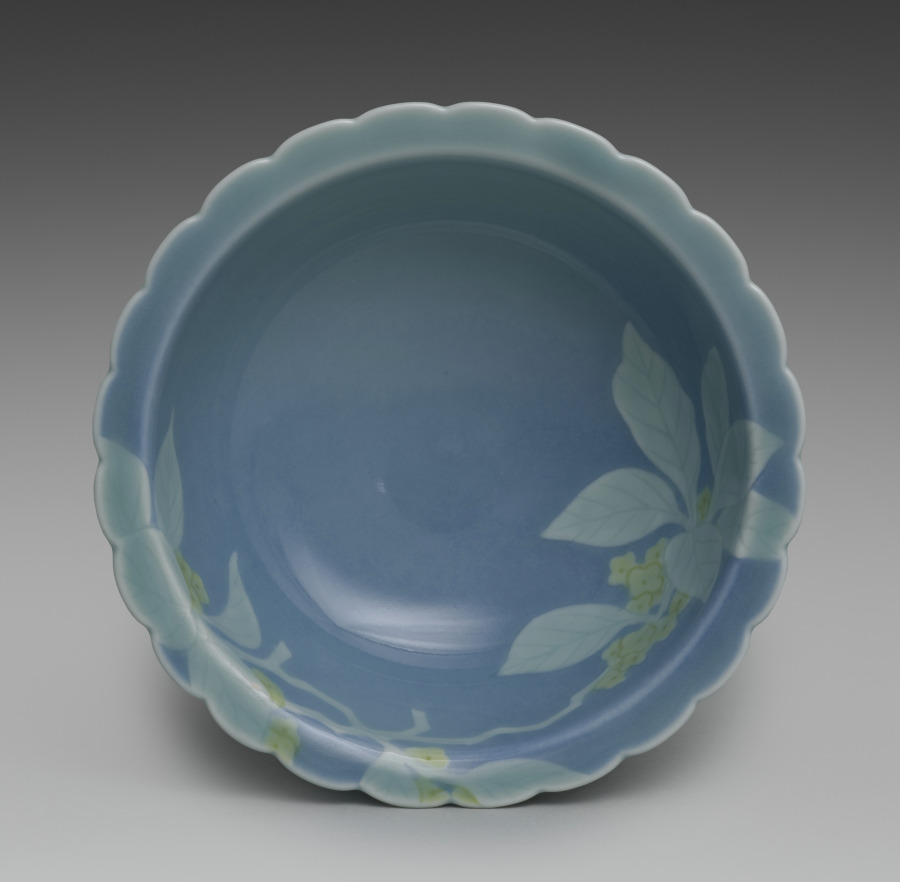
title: Dish from Dishes with Flowers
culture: Japan, Taishō period (1912–26) or Shōwa period (1926–89)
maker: Seifū Yohei IV (Japanese, 1872–1951)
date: 1914–46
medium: One from a set of five dishes; porcelain with underglaze yellow and blue glaze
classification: Ceramic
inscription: 清風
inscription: 清風造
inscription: 成山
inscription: 清風盧人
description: One can imagine a cool summer breeze when looking at this set of dishes, each shaped with a crenulated mouth and glazed with blue. Around the rim and into the basin, the bowls have low-relief designs of flowers with underglaze yellow petals; their leaves and stems show white through the glaze. On each dish, the design continues over the rim onto one side.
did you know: Seifū Yohei IV’s dishes with flowers feature underglaze yellow.